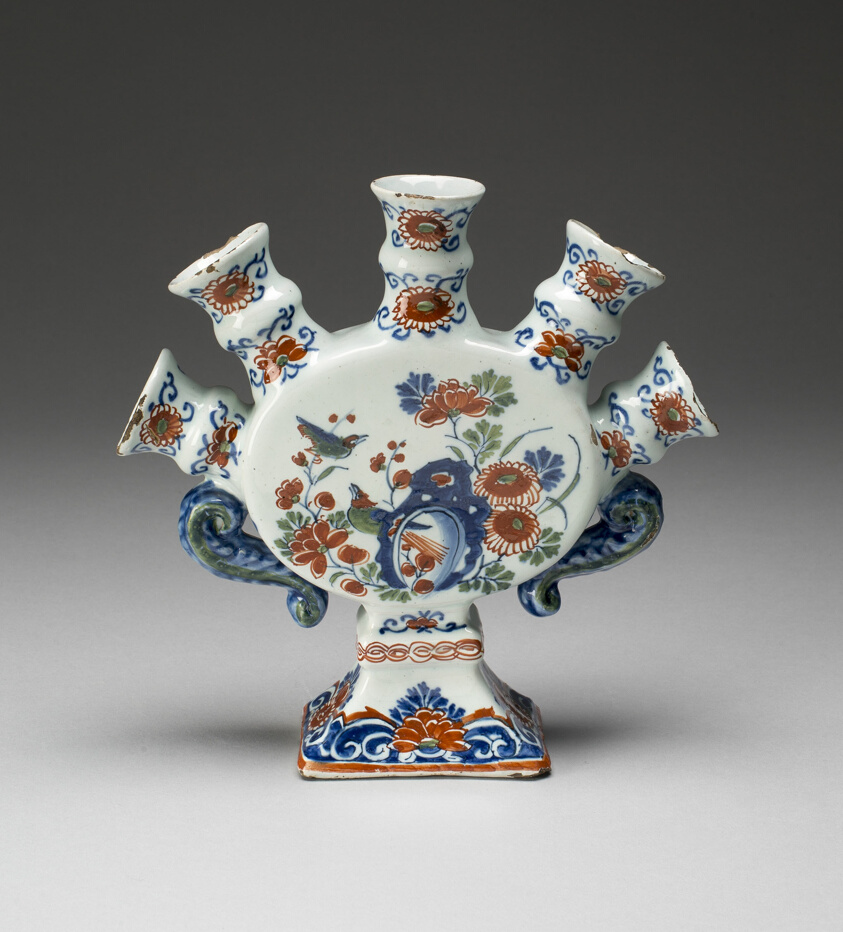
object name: Ceramics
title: Flower Vase (one of a pair)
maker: De Grieksche A (The Greek A) Factory; Delft, Netherlands, 1658-1811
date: c. 1700-22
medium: Tin-glazed earthenware (Delftware)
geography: Delft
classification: vase; vessel; european decorative arts; tin-glazed ware; earthenware; ceramics